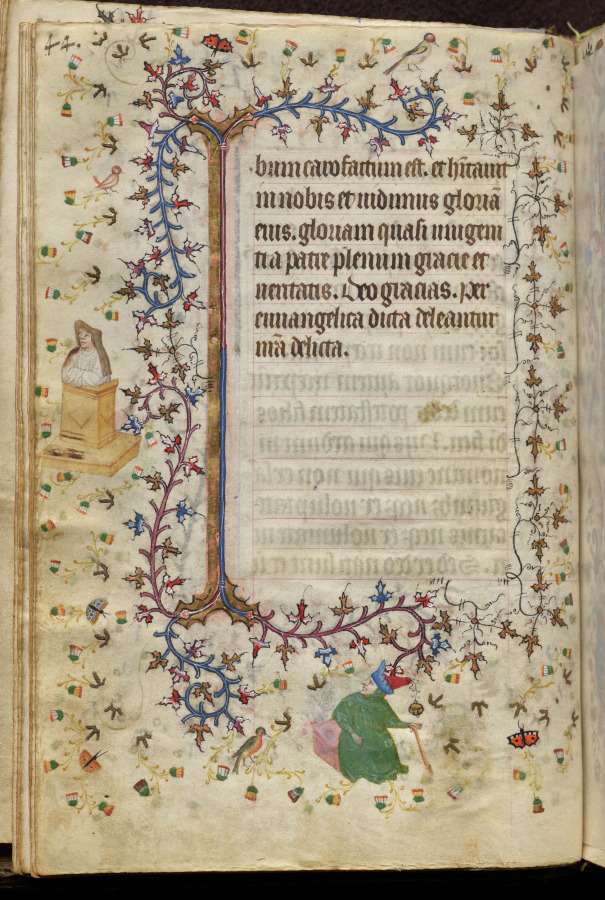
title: Hours of Charles the Noble, King of Navarre (1361-1425): fol. 22v, Text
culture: France, Paris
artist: Master of the Brussels Initials and Associates (French)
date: c. 1405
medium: ink, tempera, and gold on vellum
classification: Bound Volume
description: This precious volume was obviously highly prized by its owner, the French-born King of Navarre, who had his coat of arms painted on no less than twenty folios. Rather than directly commissioning this manuscript from a specific workshop, it seems that Charles the Noble acquired his book of hours -- perhaps ready-made for the luxury market -- while on a trip to Paris in 1404-05. A collaborative effort, six painting styles are evidenced within the pages of this codex, those of two Italians, two Frenchmen, and two Netherlanders. The painter who was responsible for the planning and decoration of the book, and who produced seventeen of the large miniatures, was a Bolognese artist known as the Master of the Brussels Initials. His principal assistant, responsible for most of the borders, was a Florentine who signed his name "Zecho" da Firenze on folio 208 verso.